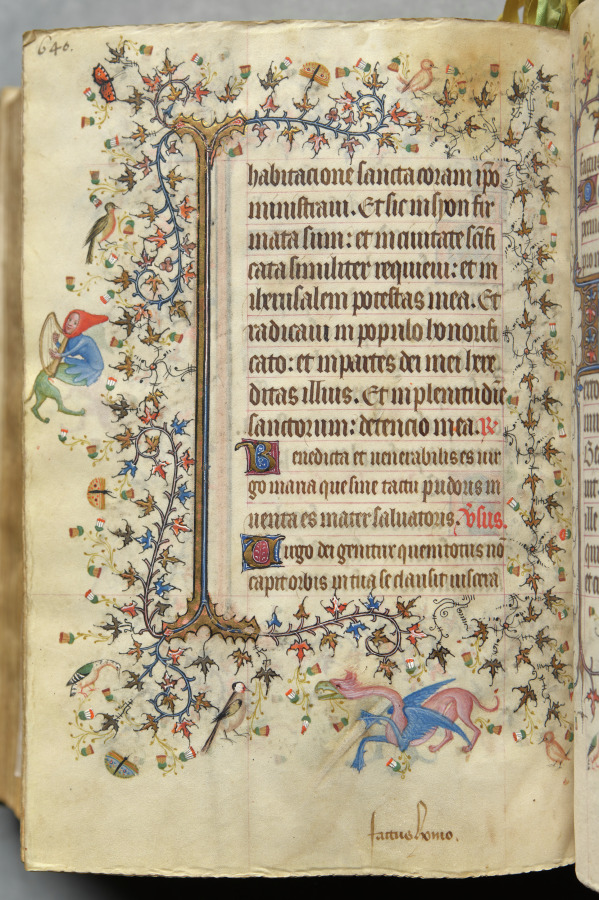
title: Hours of Charles the Noble, King of Navarre (1361-1425), fol. 314v, Text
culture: France, Paris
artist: Master of the Brussels Initials and Associates (French)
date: c. 1405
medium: ink, tempera, and gold on vellum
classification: Bound Volume